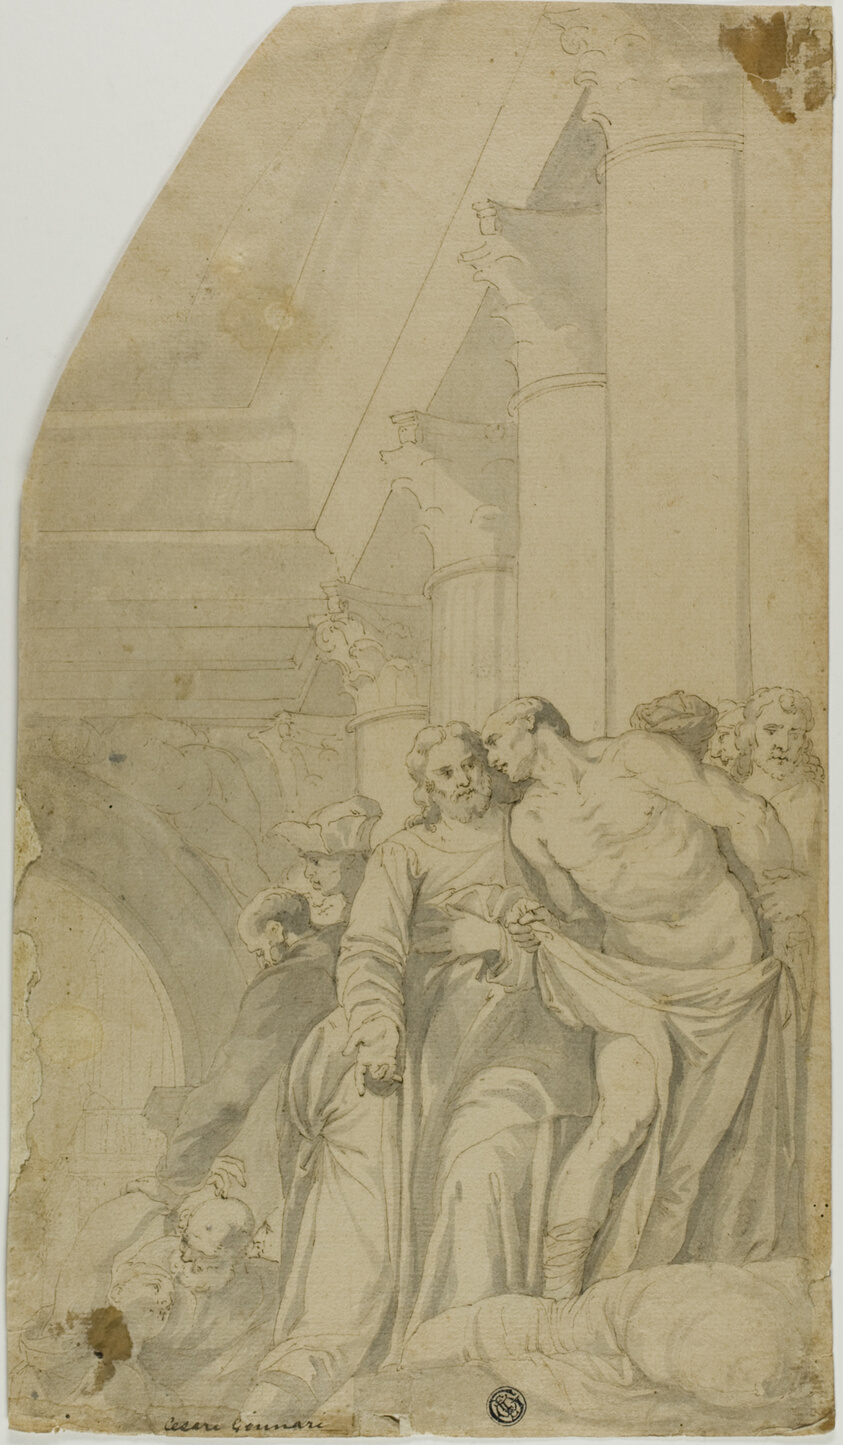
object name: Drawing and Watercolor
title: Christ Healing the Sick at the Pool of Bethesda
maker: After Paolo Caliari, called Veronese; Italian, 1528-1588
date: 17th century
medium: Pen and brown ink, with brush and gray wash, over traces of black chalk, on tan laid paper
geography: Italy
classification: ink with wash; drawings (visual works); prints and drawing